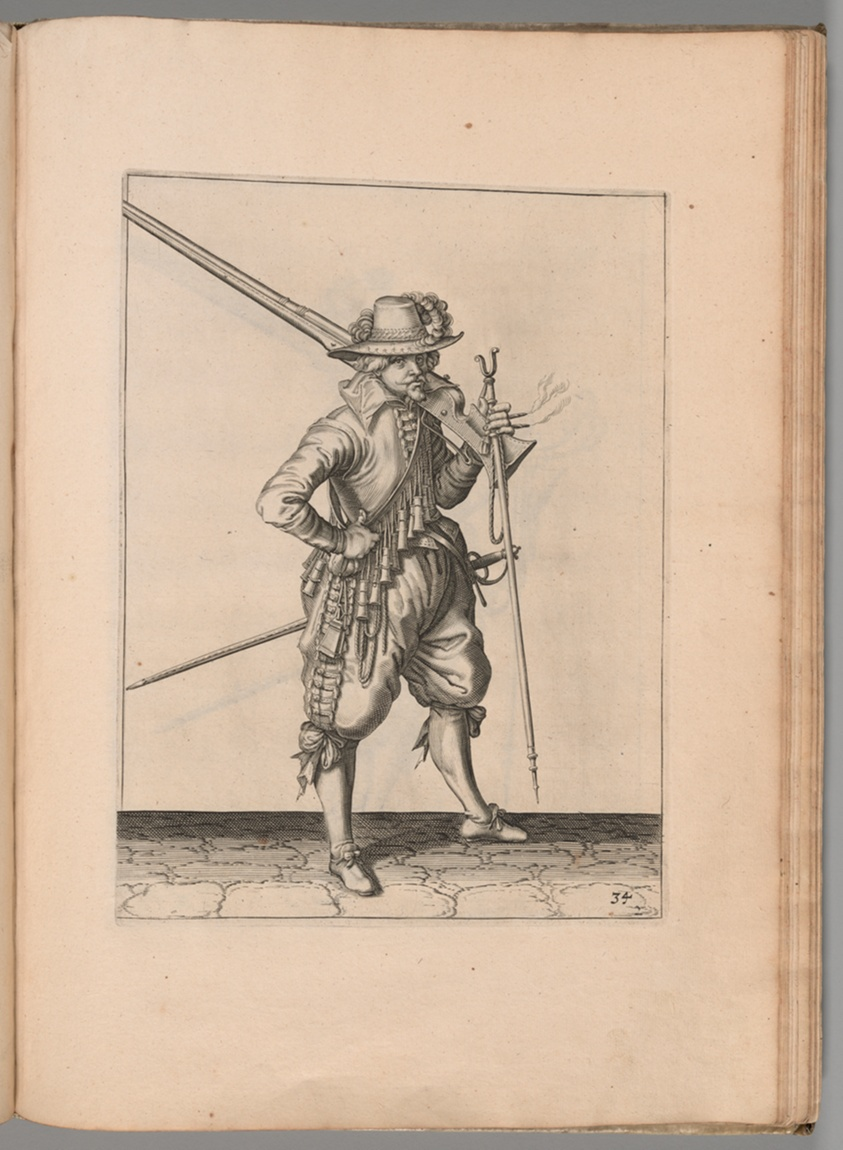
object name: Book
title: Exercise of Arms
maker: Jacob de Gheyn, II (Dutch, 1565-1629)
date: 1608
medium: Illustrated book featuring 117 copper plate engravings on ivory laid paper; full vellum binding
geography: Netherlands